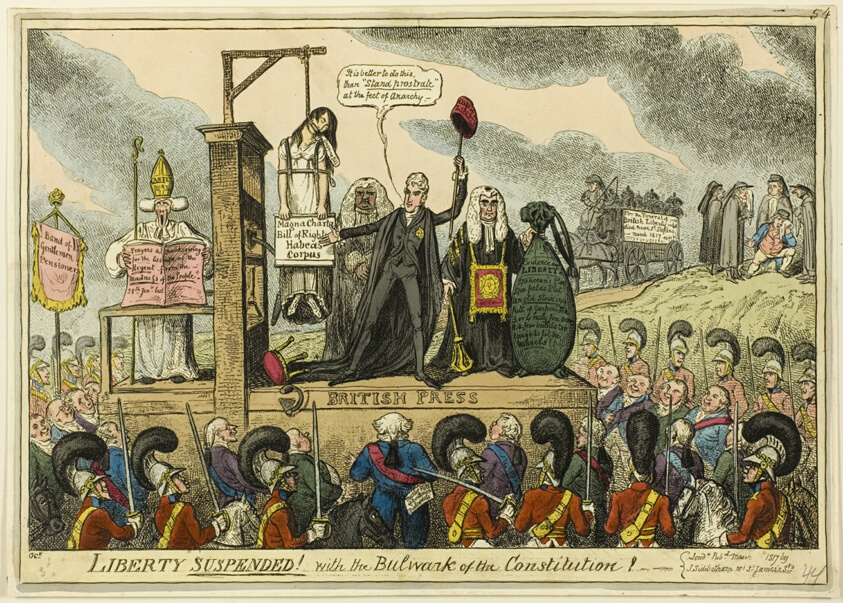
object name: Print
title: Liberty Suspended! With the Bulwark of the Constitution!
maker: George Cruikshank (English, 1792-1878); published by J. Sidebotham (English, active 1802-1820)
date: published March 1817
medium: Hand-colored etching on paper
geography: England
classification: etching; print; prints and drawing